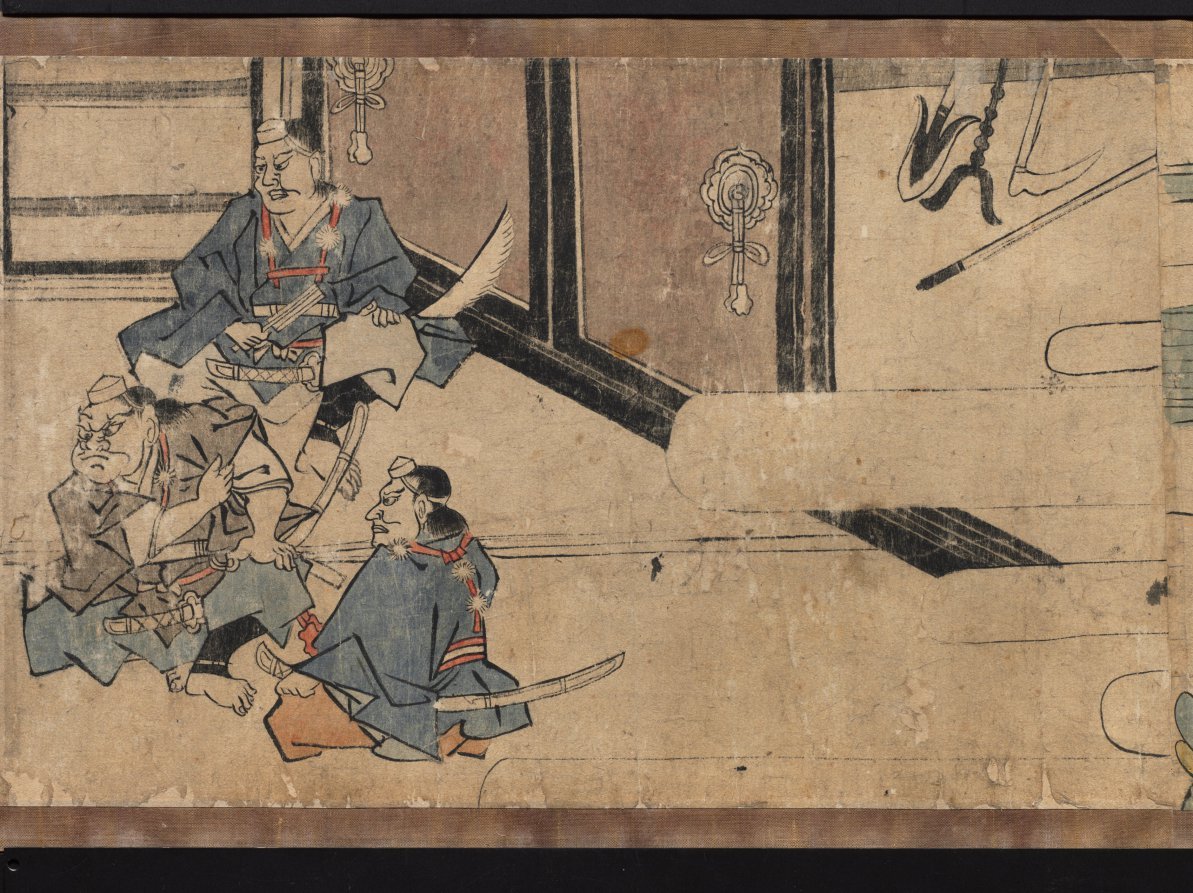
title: Oeyama Engi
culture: Japan, Edo period (1615–1868)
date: 1615–1868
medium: one of a pair of handscrolls; ink and color on paper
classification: Painting